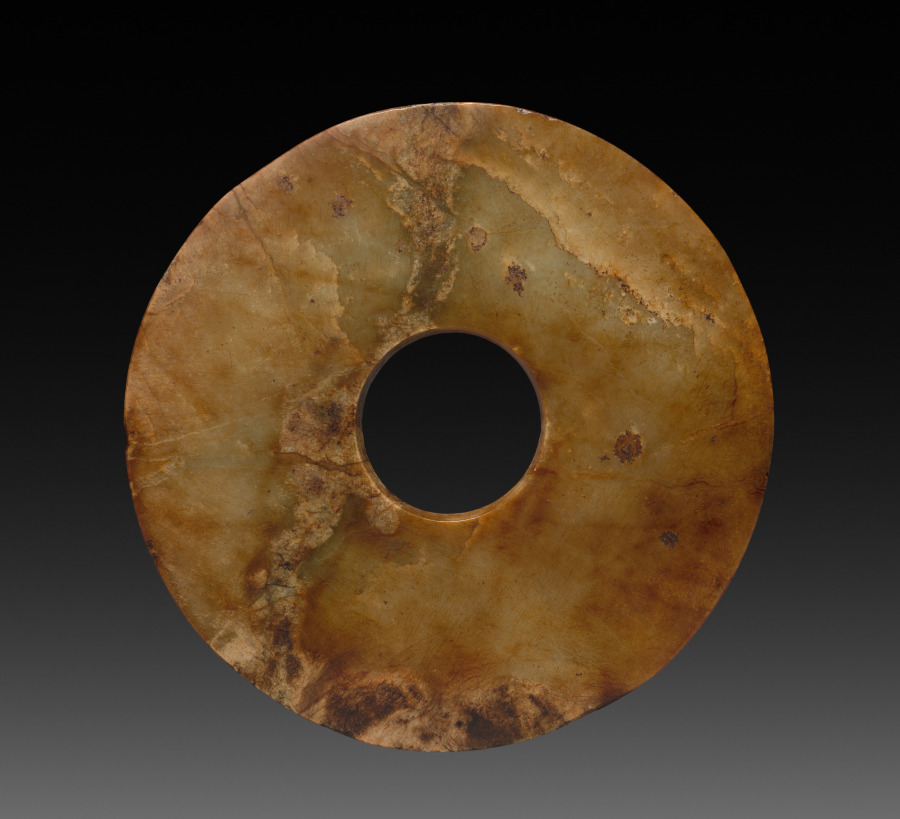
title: Perforated Disc (Pi)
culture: China, Neolithic period (3000s–2000s BCE)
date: 3000–2000 BCE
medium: jade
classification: Jade